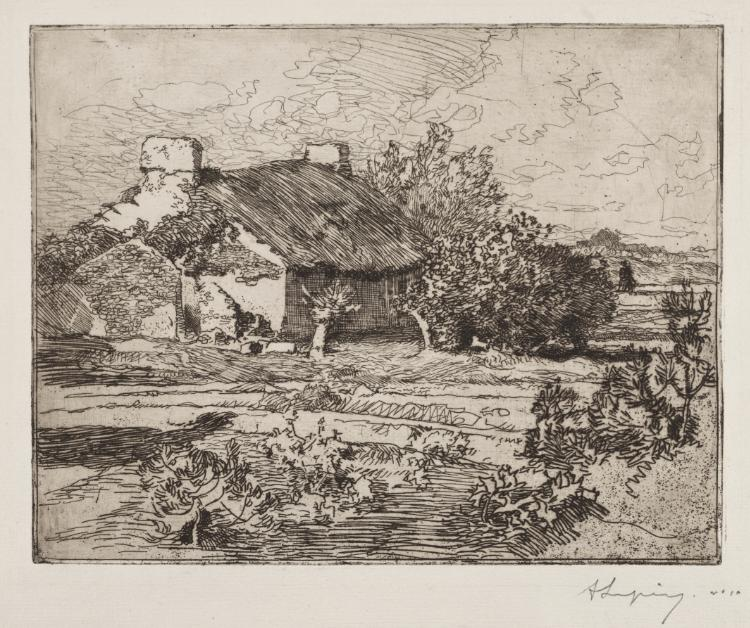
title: Vielle Bourrine, Maison du Marais, Vendée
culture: France, 19th century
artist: Auguste Louis Lepère (French, 1849–1918)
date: 1892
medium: etching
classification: Print